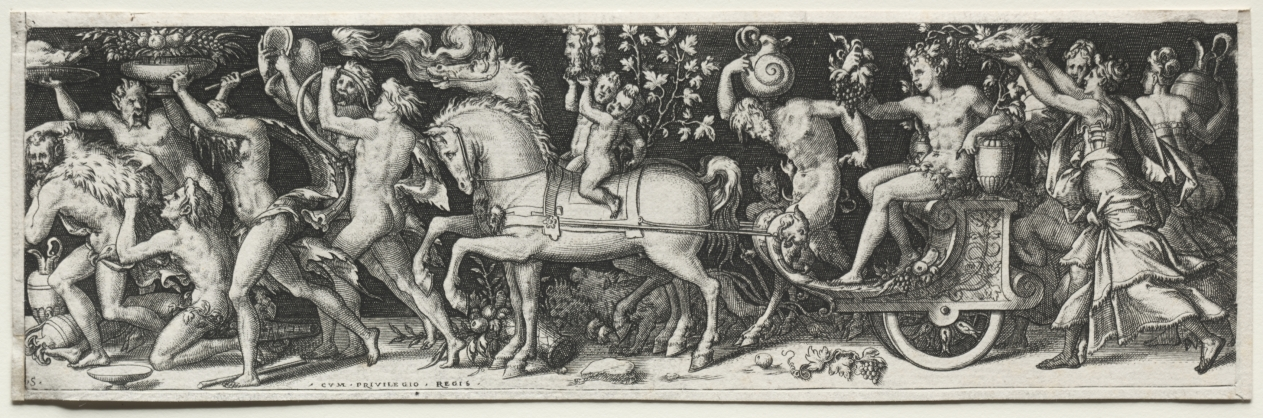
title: Combats and Triumphs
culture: France, 16th century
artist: Etienne Delaune (French, 1518/19-c. 1583)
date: c. 1550–72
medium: engraving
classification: Print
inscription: lower left, in plate: ·S· ; lower left, in plate: · CVM · PRIVILEGIO · REGIS · ; verso, lower right, in graphite: 285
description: Etienne Delaune (French, 1518/19-1583) Combats and Triumphs, probably 1560s Engravings Gift of Leonard C. Hanna 1924.671-.674 The Triumph of Bacchus Battle of Men and Animals Combat of the Naked Men Battle of the Centaurs and the Lapiths The four prints shown here come from a series of twelve known as the Combats and Triumphs. The friezelike composition reflects the artist's study of marble relief carvings on Greek and Roman sarcophagi (coffins), here reduced to a preciously small setting. Against a flat, stagelike background, Delaune's balletic warriors engage in a Mannerist version of artificial war. Etienne Delaune was inspired by the art created at Fontainebleau, but he worked in Paris and then Strasbourg during the late 1500s. His small, exquisitely executed engravings reflect his training as a goldsmith and his work as a medallist.